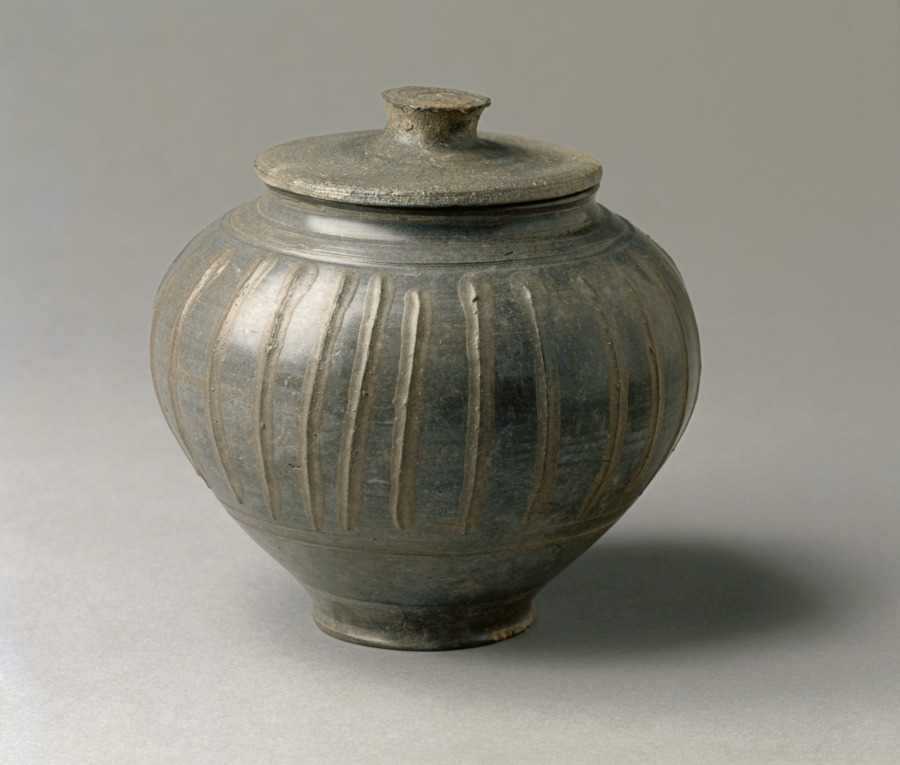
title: Pot with Cover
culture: Rhenish (Cologne), Gallo-Roman, 2nd century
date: 100–200 CE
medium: tan ware with gray and some brown burnished slip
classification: Ceramic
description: This elegant pot with its matching lid was made using a potter’s wheel, evident from the subtle horizontal rings that are visible across the belly of the vessel. The vertical ribs were added after the pot was removed from the wheel, using a thick clay paste. The vessel’s lid suggests that it was used for storage.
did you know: The shiny surface of this pot was made using a technique called burnishing, performed by polishing a surface with a hard, smooth object.